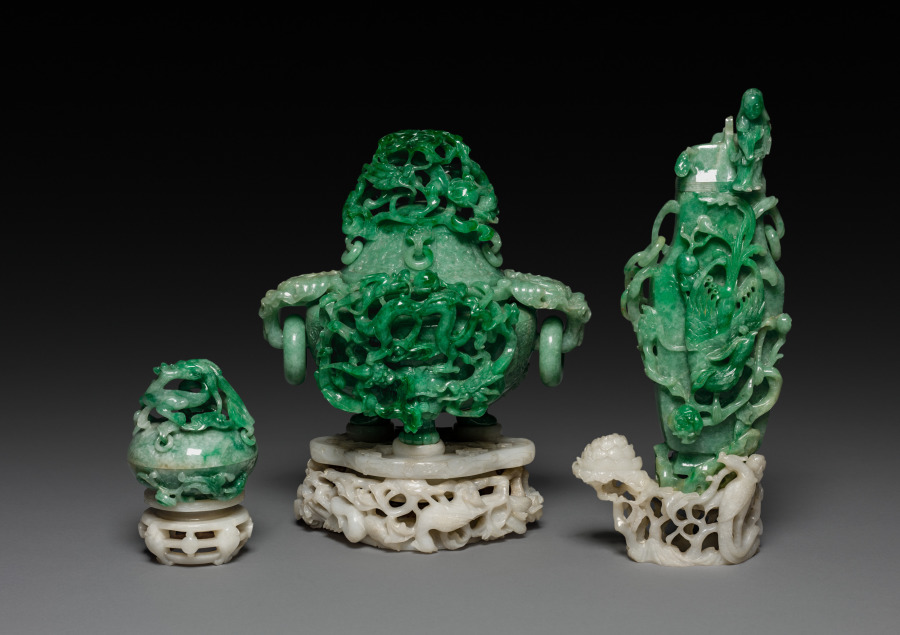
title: Three-Sectional Altar Group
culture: China, Qing dynasty (1644-1911)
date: 1644–1911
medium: jade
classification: Jade